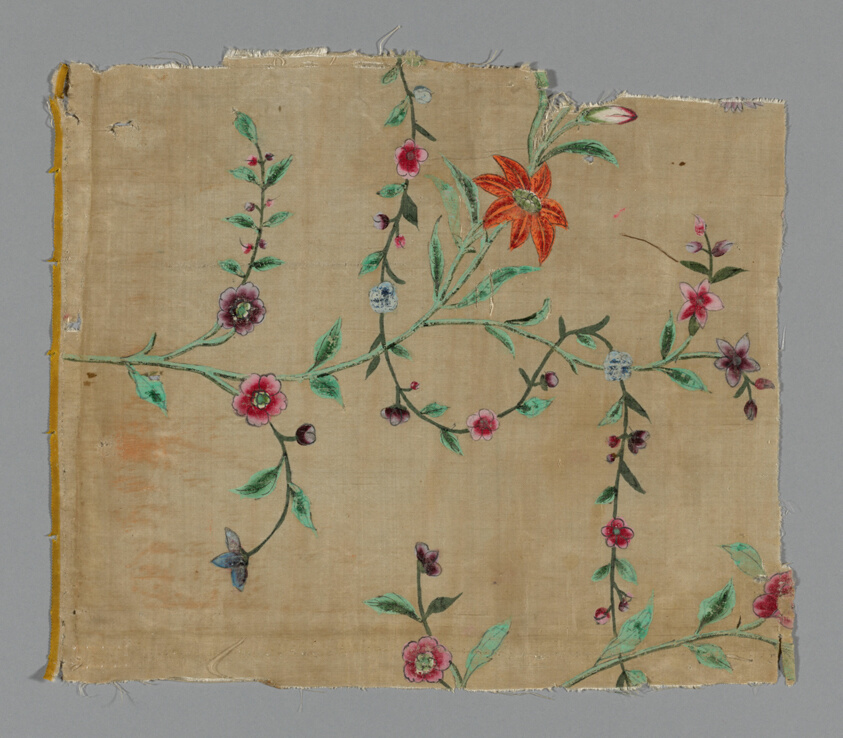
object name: Textile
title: Fragment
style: qing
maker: China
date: 18th century, Qing dynasty (1644–1911)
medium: Silk, plain weave, painted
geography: China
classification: textile; weaving - printed